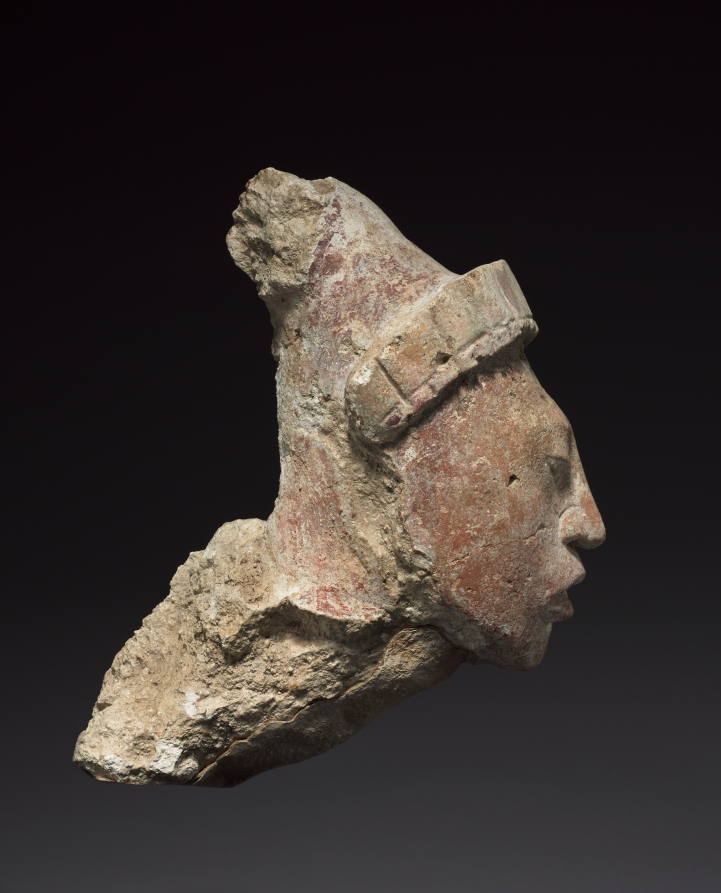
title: Head from a Building's Façade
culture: Mexico, Campeche, Maya style (250-900)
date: 250–900 CE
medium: stucco, paint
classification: Sculpture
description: The Maya often lavishly decorated the exteriors of buildings, transforming them into elaborate sculptural works in their own right. This sensitively modeled head, made from fragile stucco, would have been affixed to the façade of a palace or temple via the tenon (projection) at the back of the head. The rest of the body may have been modeled separately.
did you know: Maya elites practiced cranial modification on infants to achieve the sloped profile seen in this tenoned head.